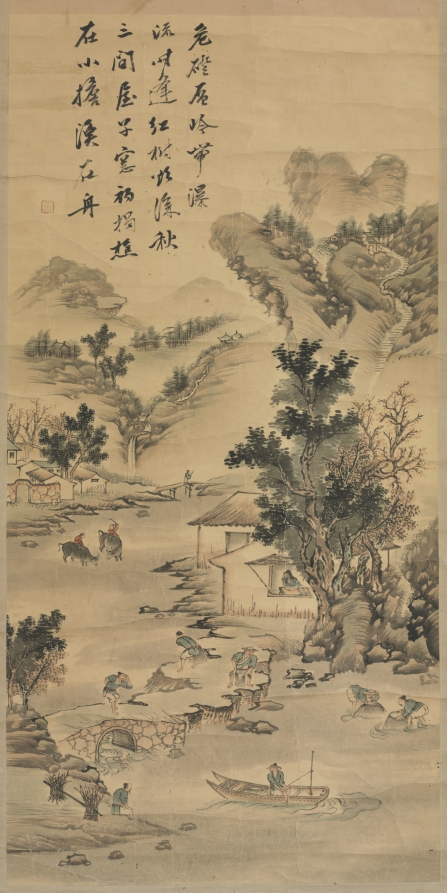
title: Landscape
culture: Japan, Edo period (1615–1868) or Korea, Joseon dynasty (1392–1910)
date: 1800s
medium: Ink and color on paper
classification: Painting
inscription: 二斎印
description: The artist of this landscape painting follows a tradition called the Southern school (南宗画). Generally, painters of the Southern school worked with monochrome ink and light colors, emphasizing calligraphic brushstrokes.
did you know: The artist of this landscape painting follows a tradition called the Southern school (南宗画), a stylistic term used to refer to intentionally unpolished amateur painting popular across East Asia around the late 1700s and afterwards.